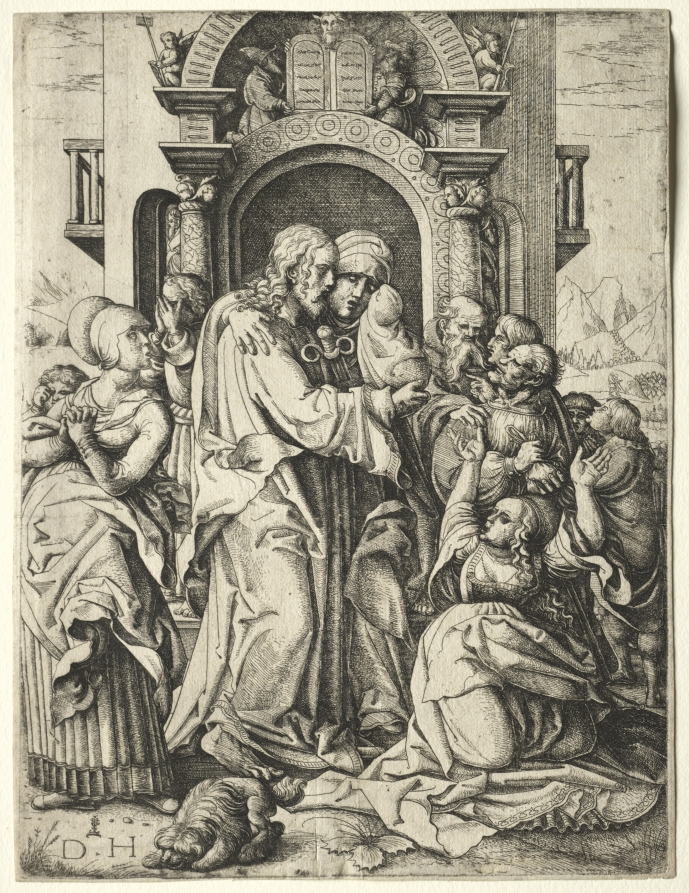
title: Christ Taking Leave of His Mother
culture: Germany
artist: Daniel Hopfer (German, c. 1470–1536)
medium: etching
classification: Print